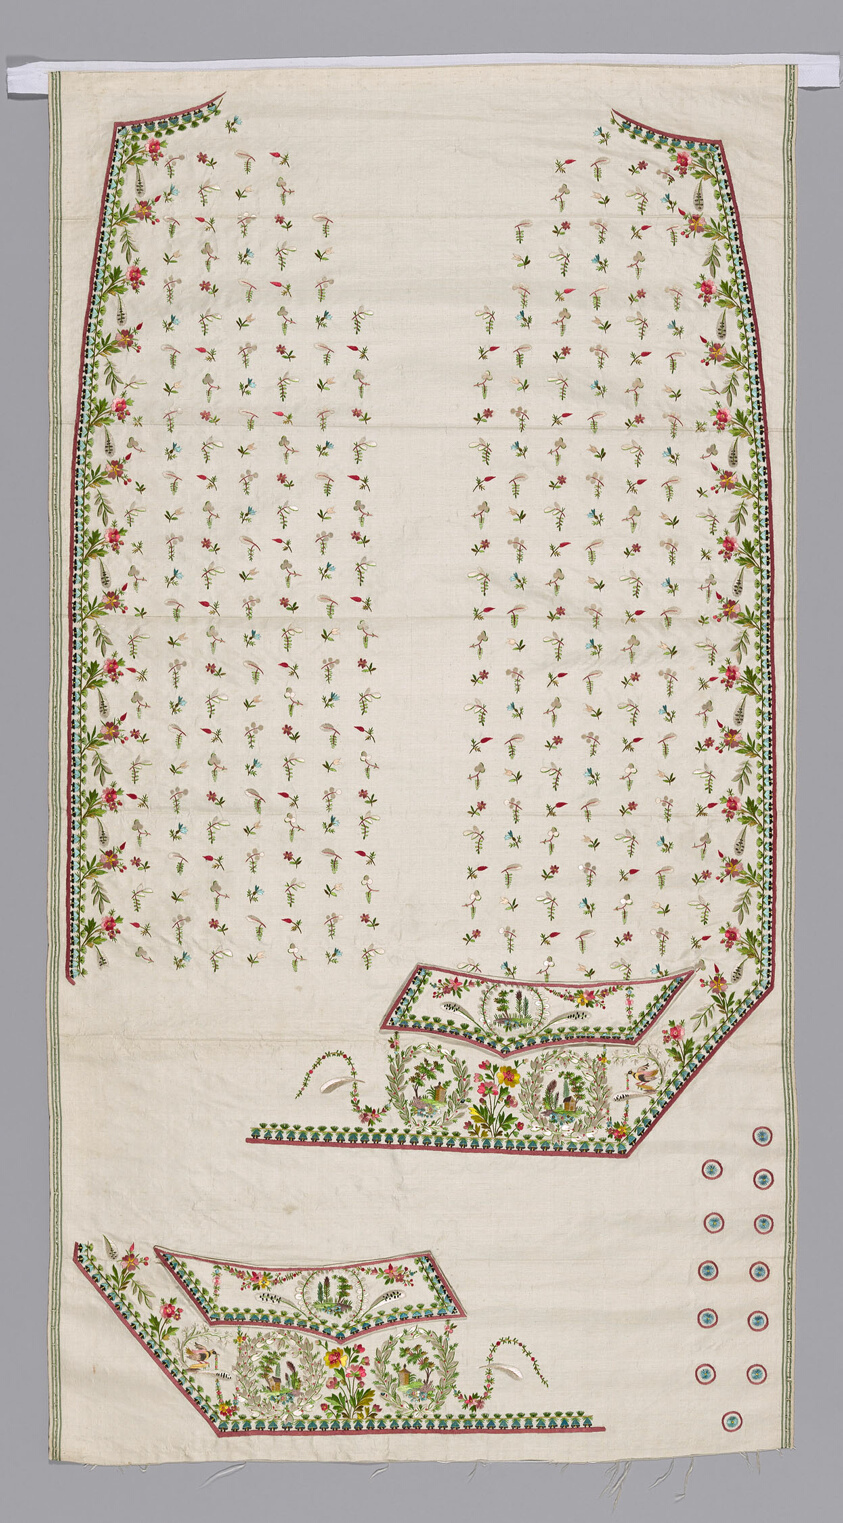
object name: Costume and Accessories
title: Embroidered Fabric for a Man's Waistcoat Front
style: 18th Century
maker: France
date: 1780s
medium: Silk, plain weave; embroidered with silk thread in individual back, outline, running, satin, split and stem stitches; couching; laid work and French knots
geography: France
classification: costume; needlework (visual works); waistcoat (garment); textile; costume - embroidery; needlework - costume; garment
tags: floral motifs, flowers, foliage, white (color), green (color), pink (color), building, floral, bird, wreaths, feathers, fashion, houses